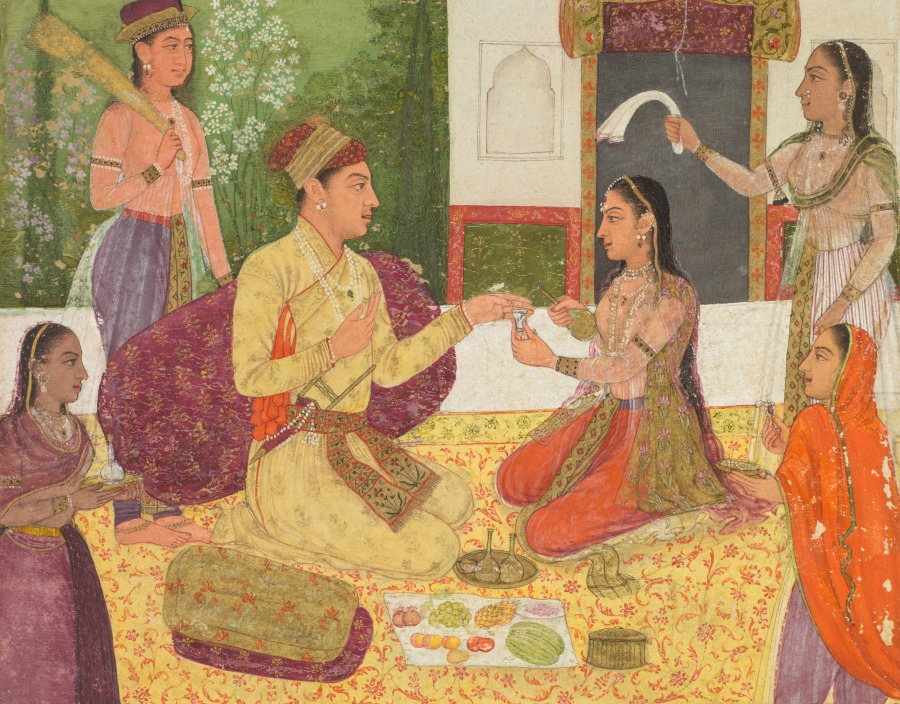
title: A prince conversing with a woman while taking refreshments on a terrace (recto)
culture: Mughal India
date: c. 1710–20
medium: Gum tempera, ink, and gold on paper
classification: Painting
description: The carpet turns a terrace into a space where a prince can enjoy the company of women over wine and fruits. A covered box on the carpet contains aromatic betel nut packets for pleasurable chewing. He has removed his shoes, which are left on the marble step. A princess pours liquor from a golden bottle into a tiny blue-and-white ceramic cup. The pair’s royal status is indicated by the attendants who hold the white cloth and peacock-feather whisks. Two other women bring jewels and a vial of perfume to be inspected and discussed by the royal connoisseurs.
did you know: The prince removed his shoes before joining the picnic on the carpeted terrace.